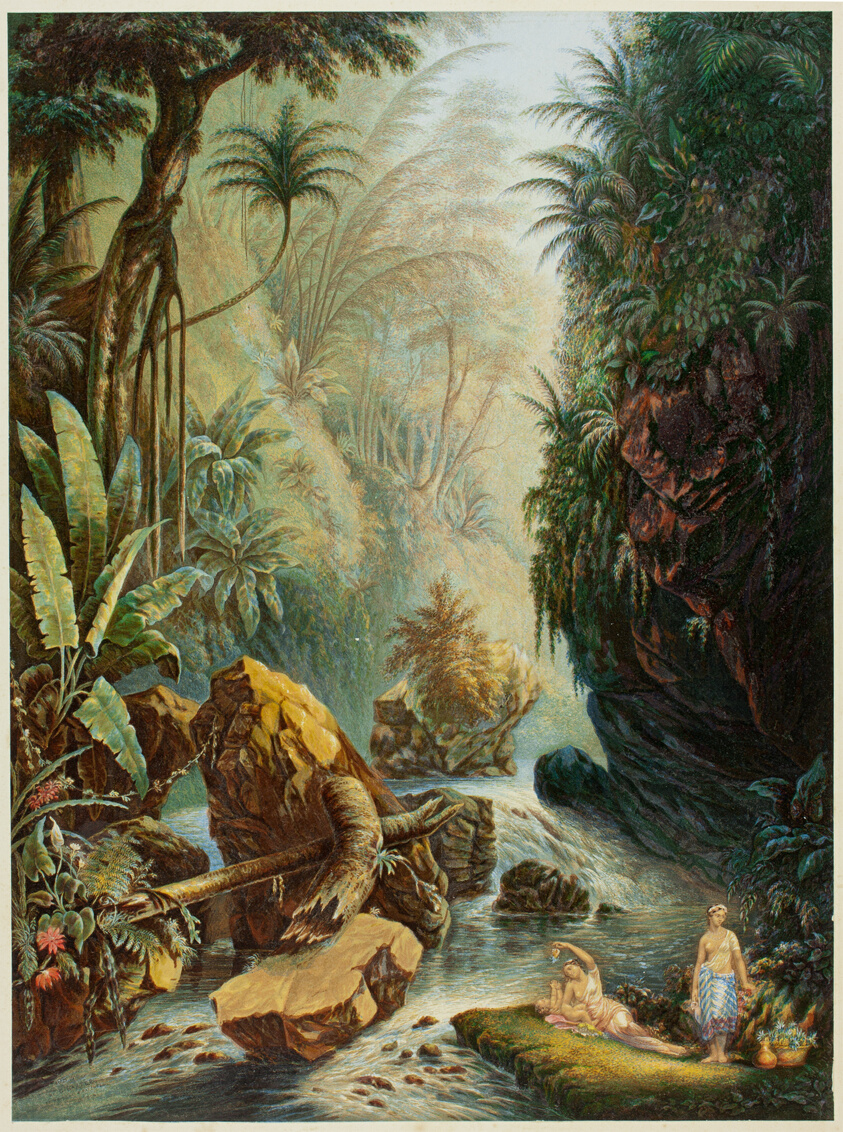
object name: Print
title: The Mountain Stream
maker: George Baxter (English, 1804-1867)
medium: Steel engraving colored with wooden blocks on paper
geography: England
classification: wood engraving; print; prints and drawing